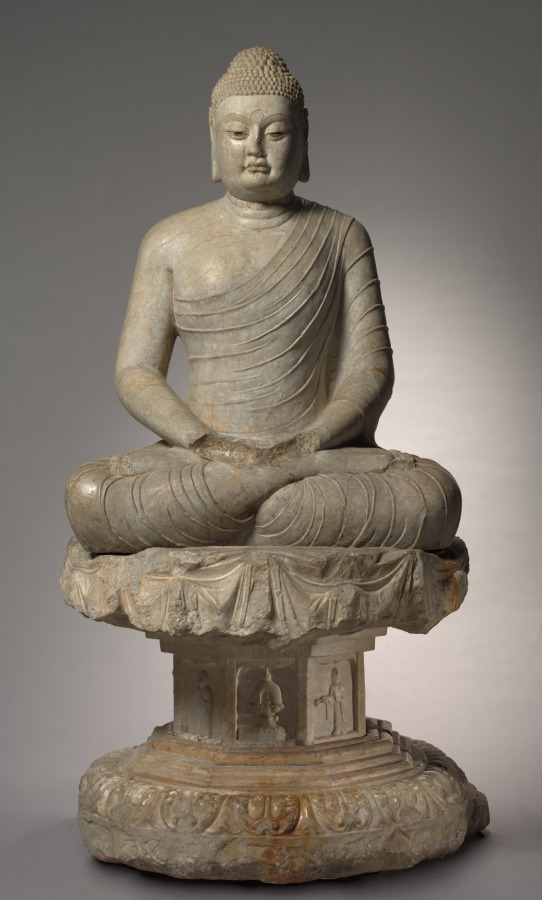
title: Seated Amitayus Buddha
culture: China, Northern Qi dynasty (550-577)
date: c. 570s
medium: marble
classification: Sculpture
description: Amitayus, the Buddha of Infinite Life, is seated in meditation on a double lotus pedestal. The pedestal was not made with the statue but the combination is faithful to the original artistic conception. The statue is an extremely rare example of a major type of Northern Qi Buddhist sculpture. The heavy, massive front highlights the sense of monumentality and the spiritual essence of the Buddha. Today the sculpture is united with a pedestal that exhibits the rich, ornate style of early Tang sculpture. It was commissioned by the Duke of Liang, Fang Xuanling (578–648), for the blessing of his second son and daughter-in-law, the Tang imperial princess of Gaoyang. The iconography and inscription suggest that it originally went with a statue, now missing, of Shakyamuni, the historical Buddha, instead of Amitayus.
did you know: The stringlike folds of the Buddha's draperies emphasize his monumental, rigidly erect torso and tubular limbs.